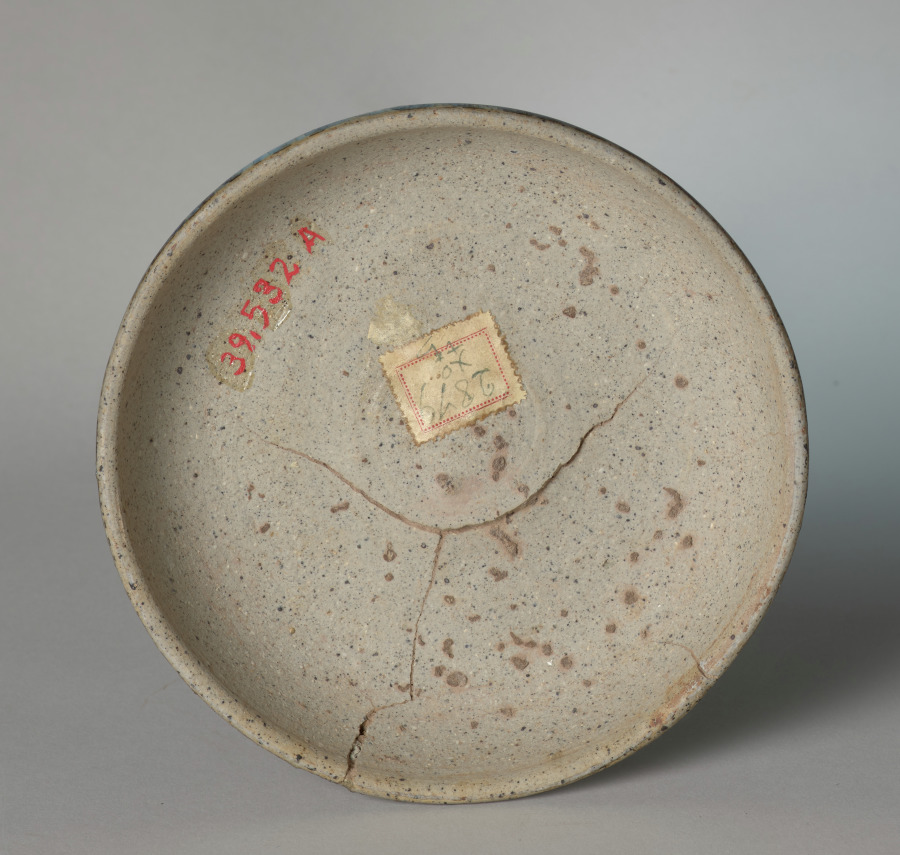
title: Covered Bowl with Painted Decoration (lid)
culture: Siam, Sawankhalok ware, 15th century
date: 1400s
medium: stoneware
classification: Ceramic